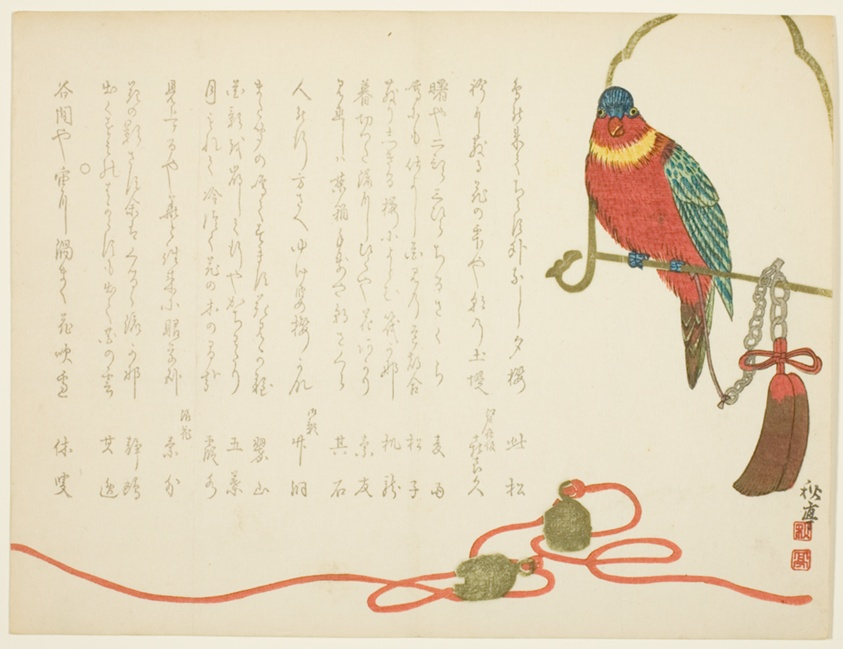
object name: Print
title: Parrot and Bells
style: Japanese (culture or style)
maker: Tanaka Shutei (Japanese, 1810-1858)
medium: Color woodblock print; surimono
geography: Japan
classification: woodblock print; print; asian art